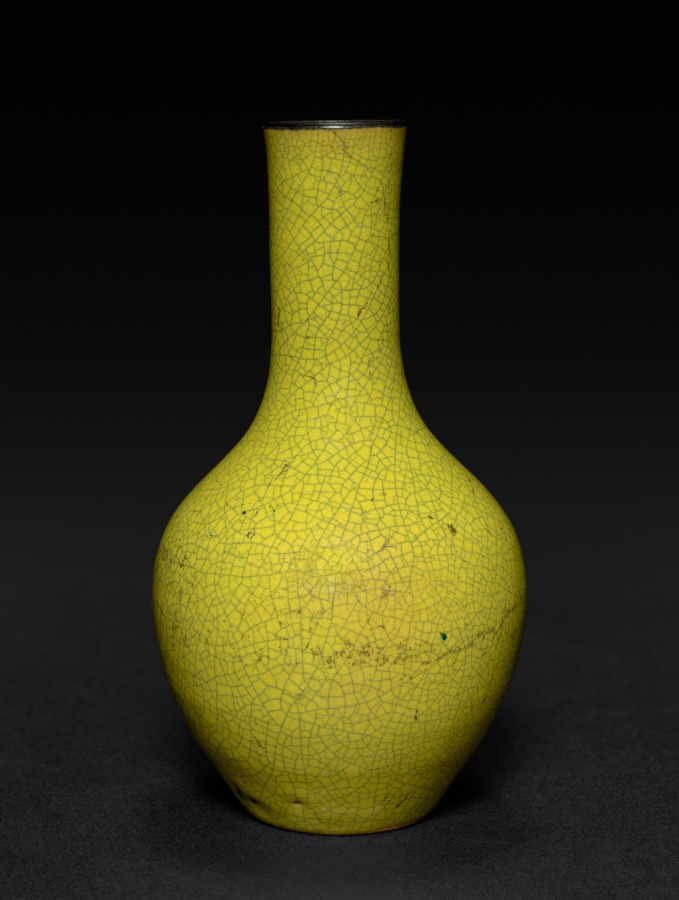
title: Vase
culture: China, Qing dynasty (1644-1911)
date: 1644–1911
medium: porcelain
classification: Ceramic